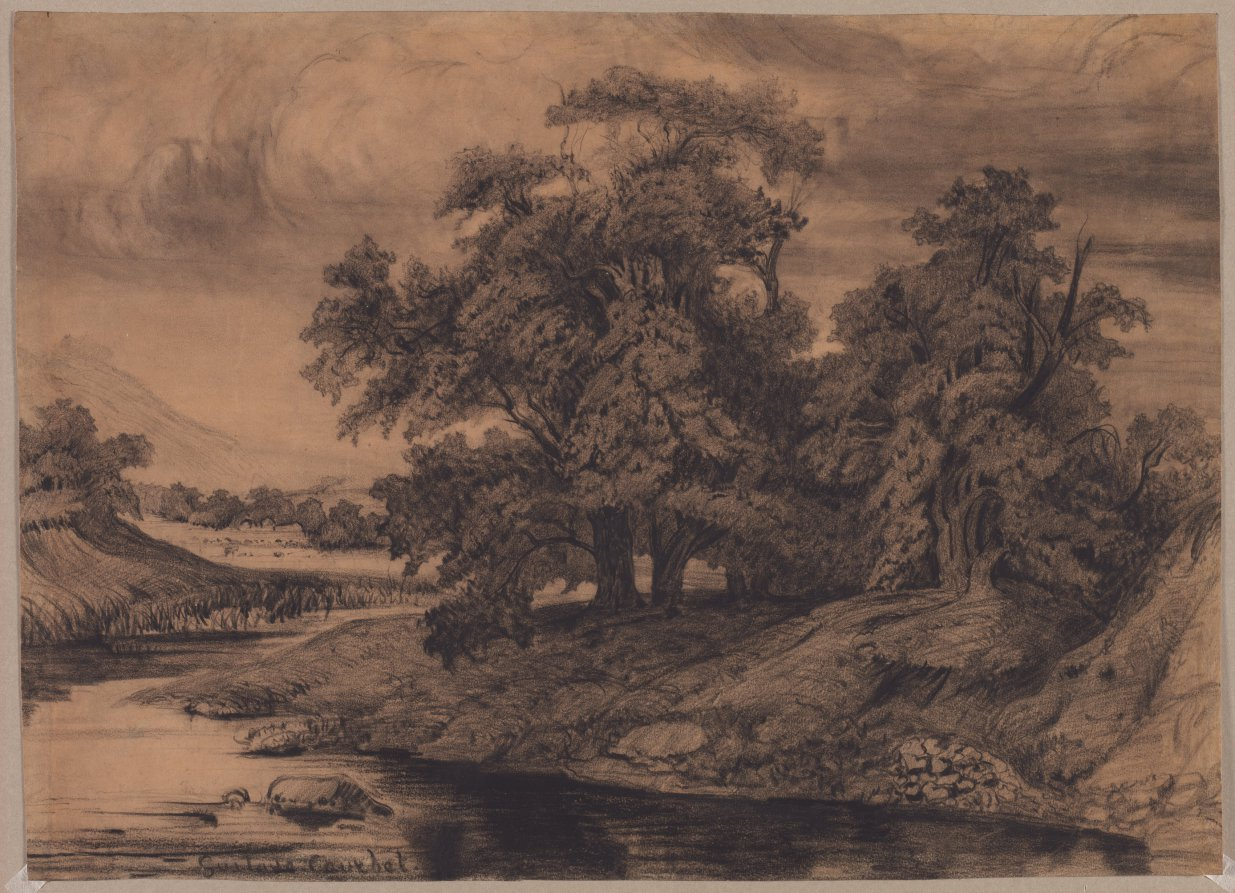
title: Landscape with Large Trees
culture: France, 19th century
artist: Gustave Courbet (French, 1819–1877)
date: c. 1870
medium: black chalk with stumping on brown wove paper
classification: Drawing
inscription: signed, lower left, in black crayon: Gustave Courbet.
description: The relatively few drawings that Gustave Courbet produced include the group of landscapes to which this example belongs. Rather than referencing a specific place, it combines a wide range of source material—tourist destinations the artist visited in Switzerland, his home in the Franche-Comté region, and paintings by Claude Lorrain and other historical landscapists. Courbet began by applying a hazy middletone in charcoal before adding detail with a darker, sharpened stick. Although surely appealing to collectors of the time, such works also had ideological significance, presenting an untouched terrain that suggested independence and freedom.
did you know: The slightly blurred appearance of this drawing recalls a similar effect common in early landscape photography.